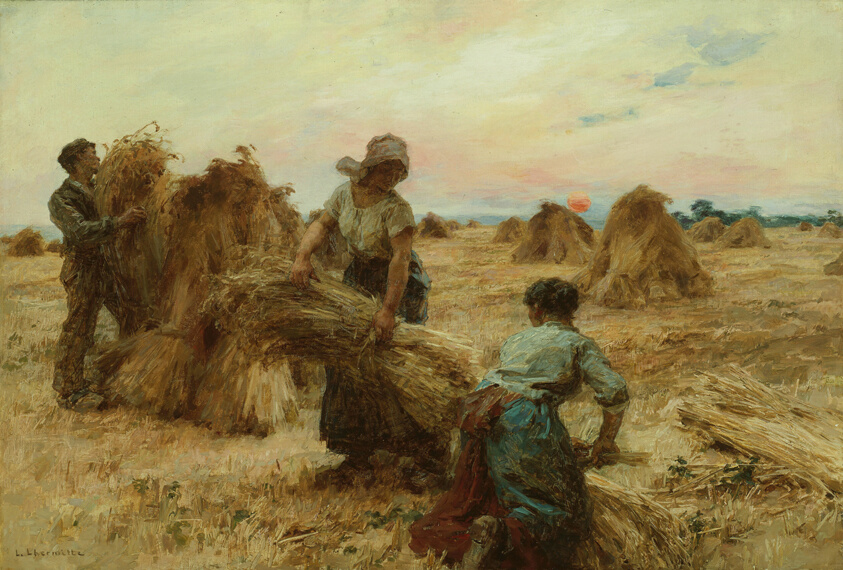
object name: Painting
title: The Harvesters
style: nineteenth century, 19th century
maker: Léon Augustin Lhermitte (French, 1844–1925)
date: 1888–89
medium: Oil on canvas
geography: France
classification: oil on canvas; french; oil paintings (visual works); paint; painting; european painting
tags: labor, clouds, farm, landscape, man, rural life, sun, women, work